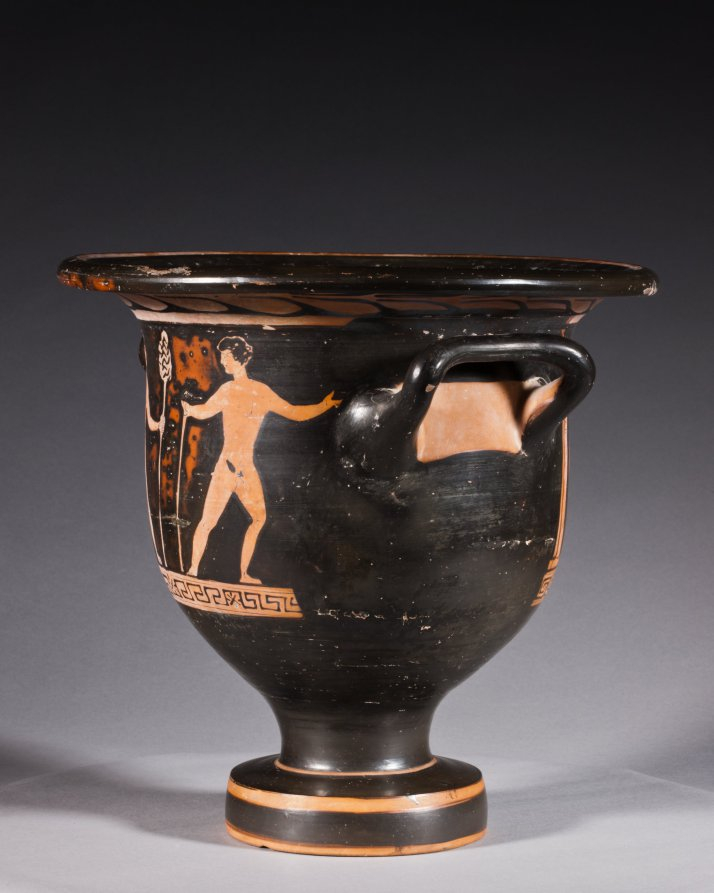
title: Red-Figure Bell Krater (Mixing Vessel): Aphrodite and Eros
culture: South Italian, Apulian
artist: attributed to Graz Painter (South Italian, Apulian, active c. 380–360 BCE)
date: c. 370–360 BCE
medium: ceramic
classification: Ceramic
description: This small mixing vessel shows a finely dressed woman seated on a chest and holding up a mirror to admire herself. Before her stands Eros, the winged god of love, holding a ribbon or sash. Behind the woman stands a pillar with the inscription ΑΦΡΟΔΙΤΗ, or APHRODITE, the goddess of love. Such labels are rare on vases, and scholars debate whether this names the woman shown as Aphrodite herself, with her son Eros, or a bride envisioning herself as Aphrodite, just before her wedding.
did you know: The dancing nude youths on the reverse are unusual; typically they would be standing and draped.